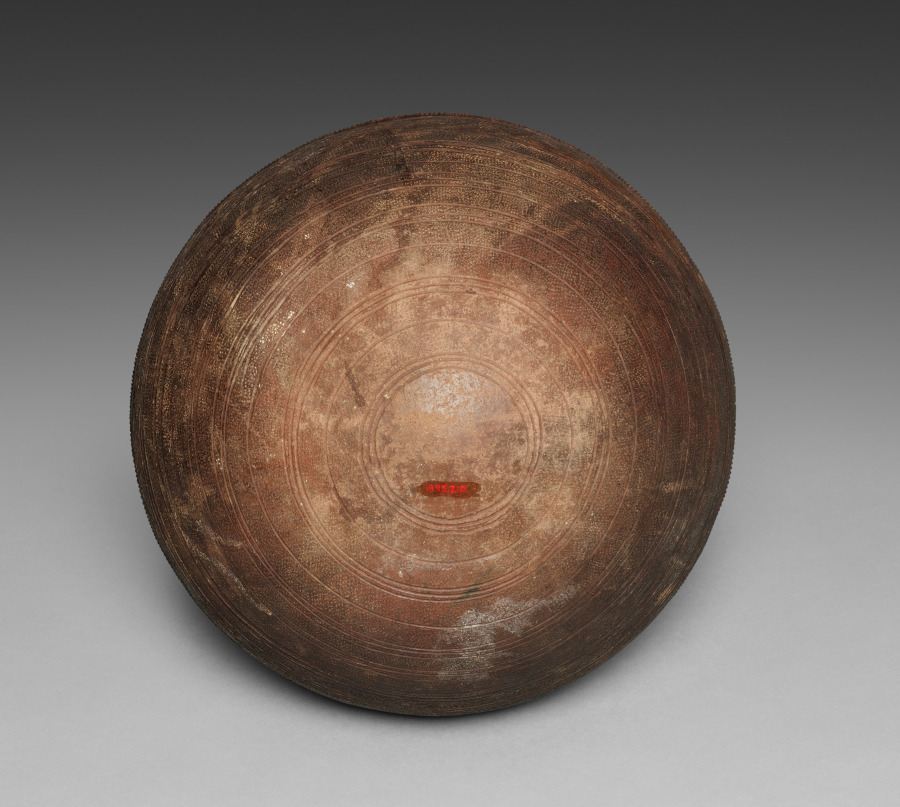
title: Water Transport Jar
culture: Africa, West Africa, Nigeria, Nupe-style pottery, unknown female potter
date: 1900s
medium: Terracotta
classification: Vessels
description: The Nupe, an Islamic people from northern Nigeria, embellish pottery and metalwork with intricate, nonrepresentational patterning. A female potter built this vessel by joining two bowls into a globe shape, then adding the neck. After drying, she used shells to press in designs before burnishing the exterior to a high shine. Finally, she fired the gourd-shaped vessel in a furnace. The patterns beautify and allow a firm grip when lifting the vessel. As the Gwari and Nupe people are neighbors, pottery shapes and designs often transferred between them. Look for similar zigzags and concentric lines on the nearby Gwari-inspired vessels.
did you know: The shape of this vessel probably developed from real gourds used to hold liquids.